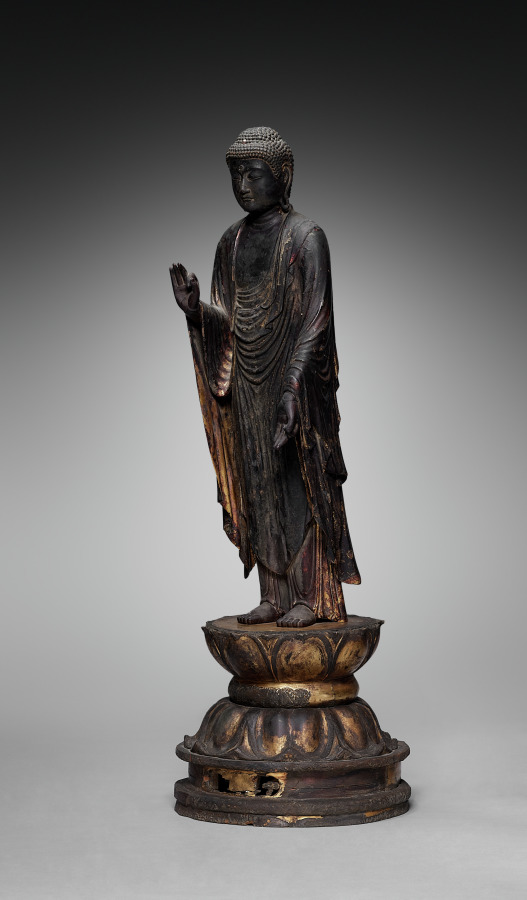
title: Amida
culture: Japan, Kamakura period (1185–1333)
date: 1200s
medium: Wood with lacquer and gilding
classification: Sculpture